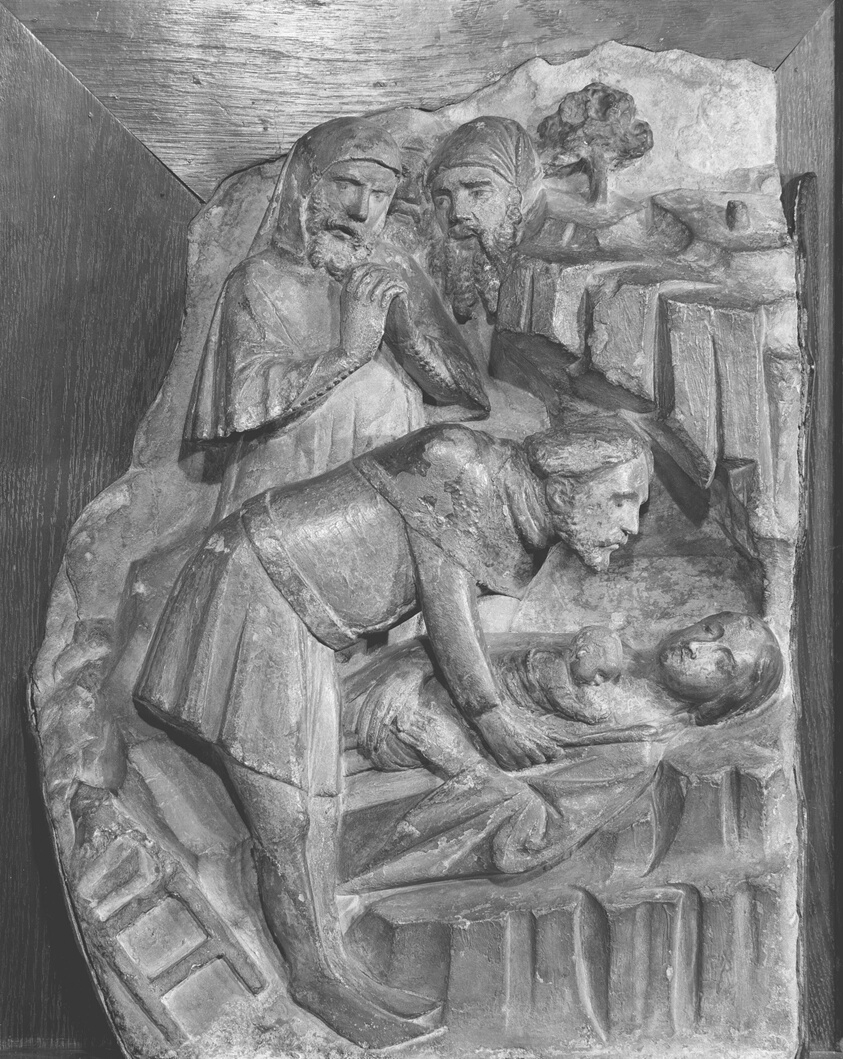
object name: Sculpture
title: Scene from the Legend of Saint Perpetua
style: 14th century, 15th century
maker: Spanish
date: 1350/1400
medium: Limestone with traces of polychromy and gilding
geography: France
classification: relief; sculpture; limestone; sculpture/stone; spanish; stone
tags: saints, babies, bed, men, religion, religious, religious figures, religious scenes, woman